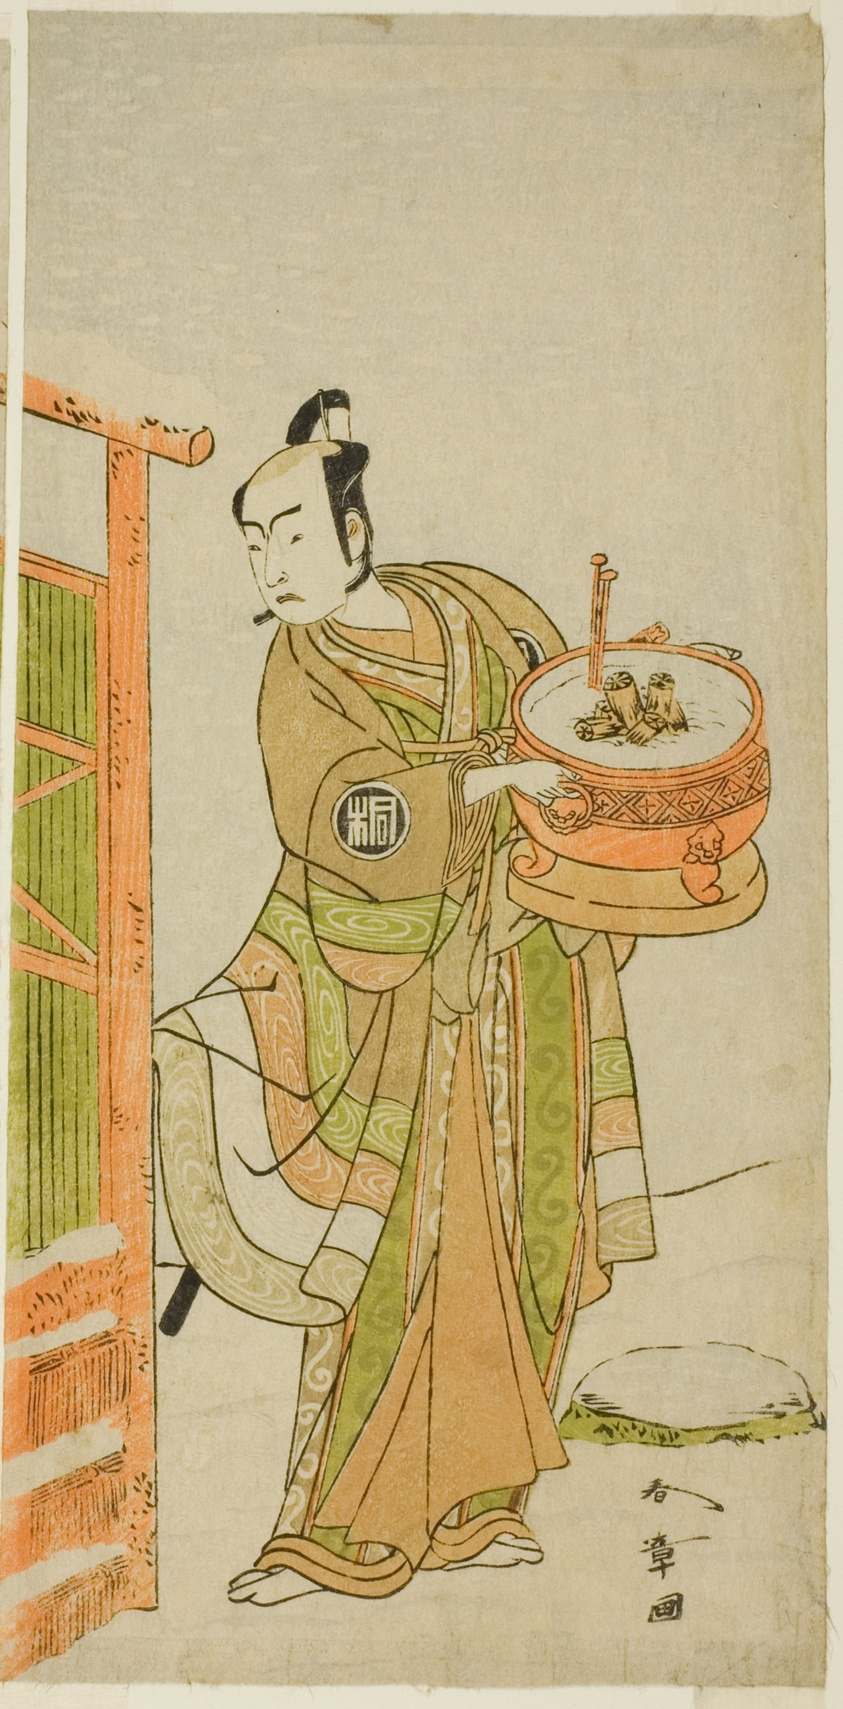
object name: Print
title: The Actor Arashi Sangoro II as Ito Kuro Disguised as Banta in the Play Izu-goyomi Shibai no Ganjitsu, Performed at the Morita Theater in the Eleventh Month, 1772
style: Japanese (culture or style)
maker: Katsukawa Shunsho 勝川 春章; Japanese, 1726-1792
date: c. 1772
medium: Color woodblock print; hosoban; right sheet of diptych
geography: Japan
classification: woodblock print; print; asian art